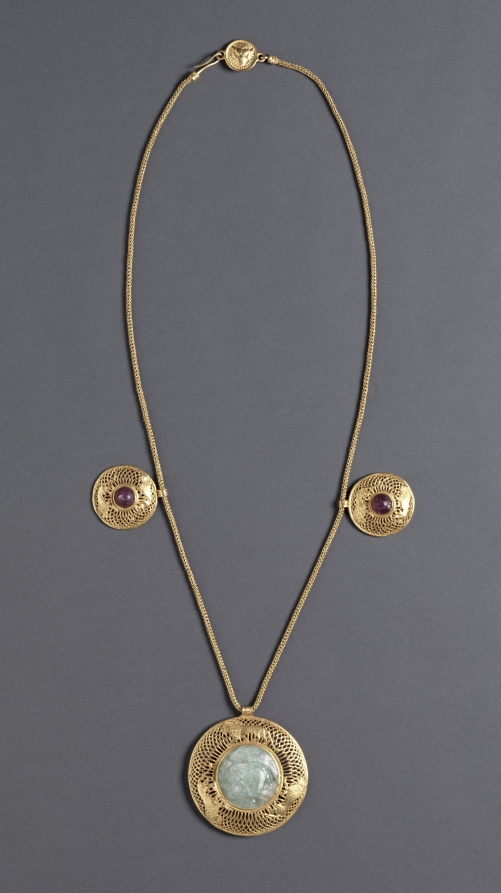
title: Necklace with Three Pendants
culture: Greece, Roman Empire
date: 1–200 CE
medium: gold, amethyst, and beryl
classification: Jewelry